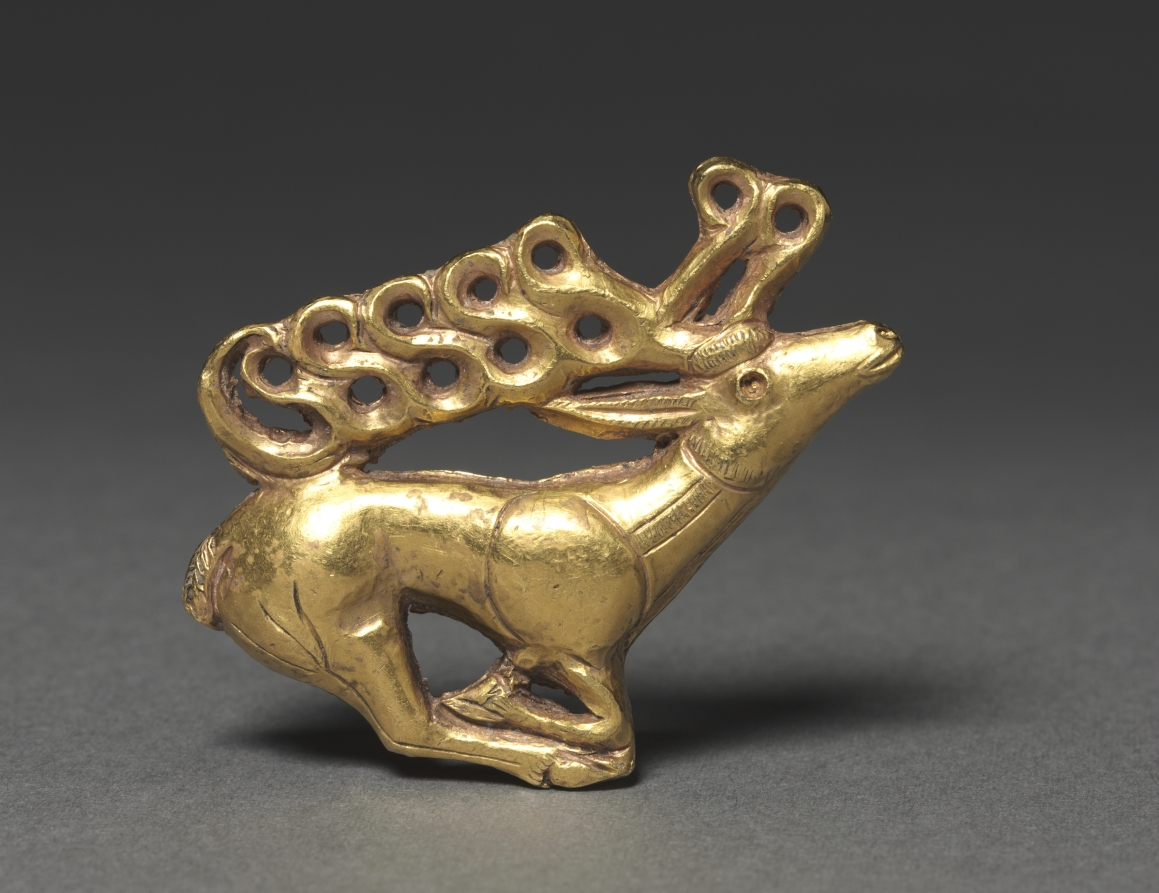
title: Stag Plaque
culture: Western Asia, Scythian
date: 400–300 BCE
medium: gold, cast in shell mold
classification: Sculpture